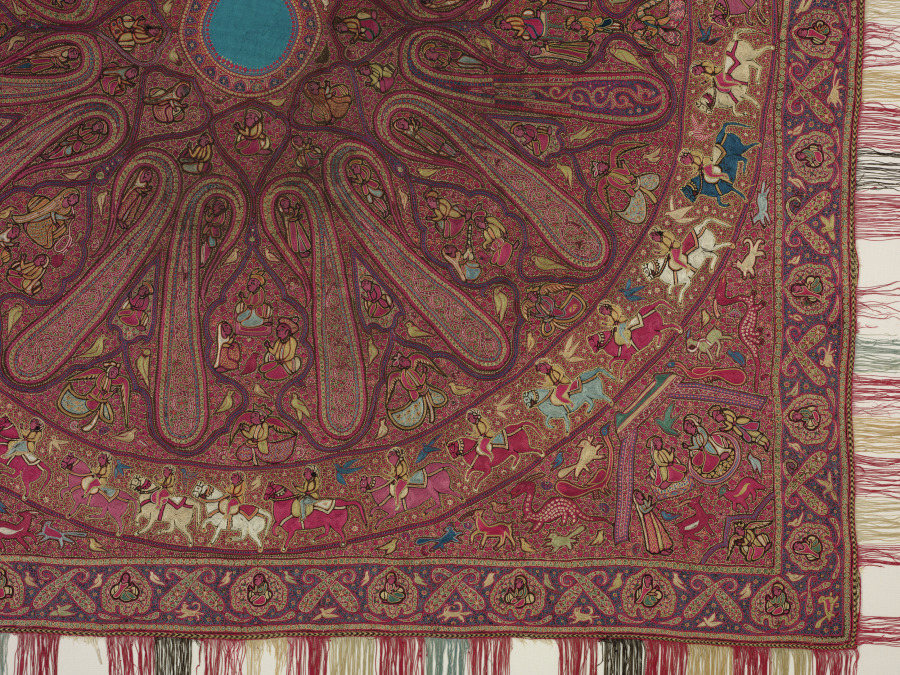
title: Square Shawl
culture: India, Kashmir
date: c. 1850–70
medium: Silk and silver filé, wool: chain stitch embroidery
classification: Embroidery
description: By the 1800s, the Himalayan foothill region of Kashmir was renowned for distinctive embroideries, and Kashmiri shawls were coveted by women throughout the British Empire. The center of this square shawl is in the form of an eight-petaled lotus, a symbol for the sun, and around it are the elongated forms of slender cypress trees, which became the inspiration for paisley. Every space is populated with figures: seated, standing, male, female, or playing musical instruments. Others are winged heavenly figures called peri. Birds are the only animals in these central spaces, suggesting a heavenly realm. In the next concentric ring riders in an equestrian procession alternate with flying birds. In the spandrels, the triangular sections between the circle and the square, are gatherings under a tent with animals. Some local Himalayan animals can be identified, such as the spotted snow leopard and the snake-eating markhor goat.